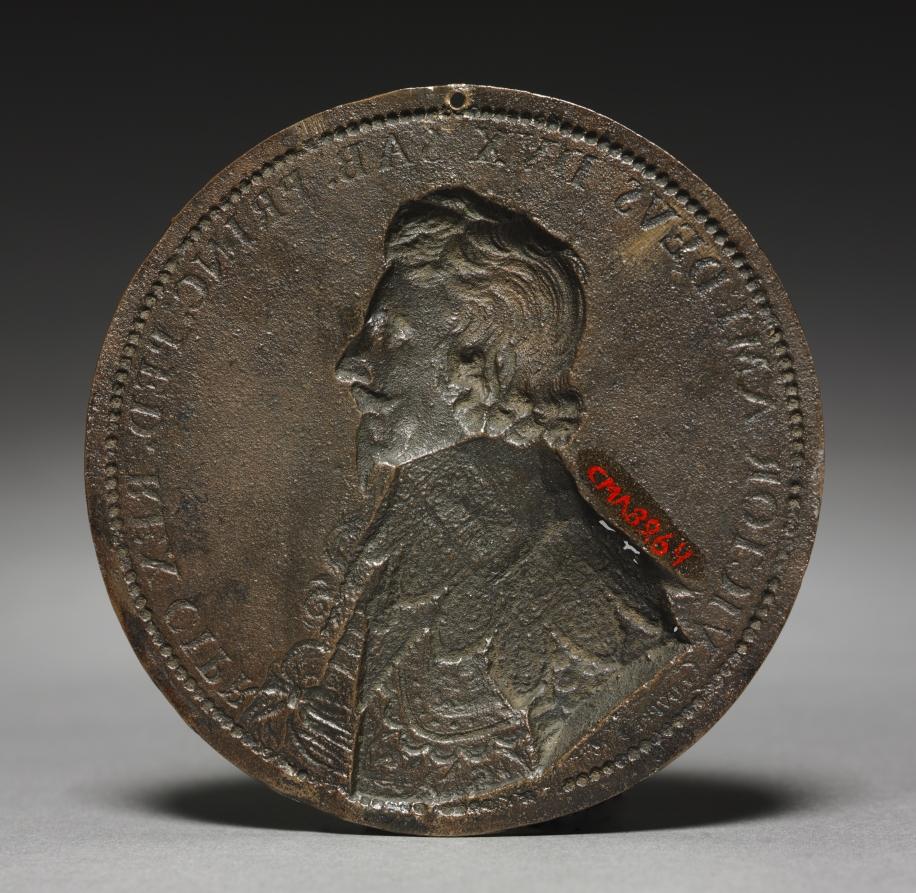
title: Portrait of Victor Amedeus of Savoy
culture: France, 17th century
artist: Guillaume Dupré (French, 1576–1643)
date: 1636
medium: bronze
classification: Sculpture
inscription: inscribed: VICTOR AMADEUS DUX SAB.PRINC.PED.REX CIPR/G.DVPRE F 1636.